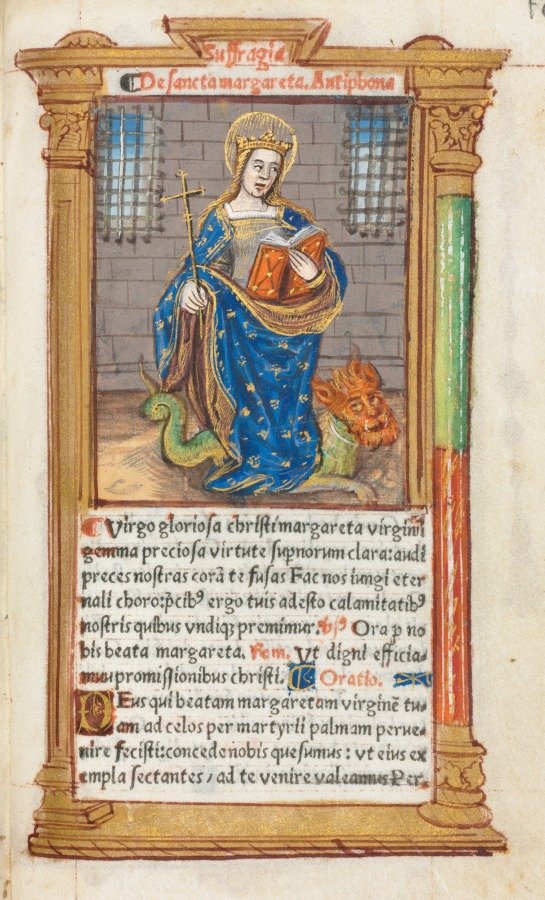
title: Printed Book of Hours (Use of Rome): fol. 110r, St. Margaret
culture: France, Paris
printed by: Guillaume Le Rouge (French, Paris, active 1493–1517)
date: 1510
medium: 112 Printed folios on parchment, bound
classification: Bound Volume